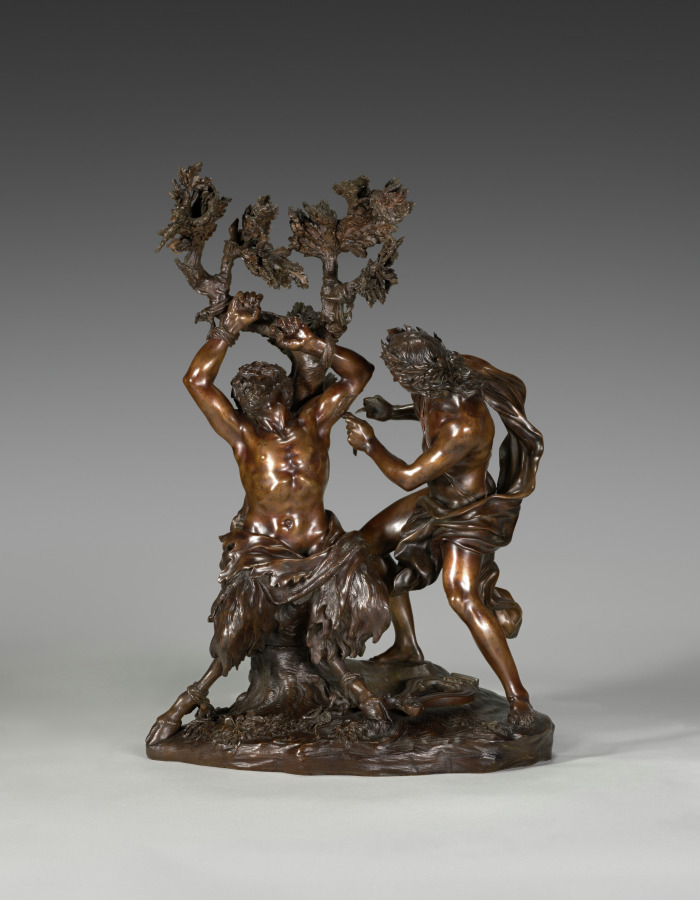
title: Apollo Flaying Marsyas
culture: Italy, Florence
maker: Giovanni Battista Foggini (Italian, 1652–1725)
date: c. 1691–1700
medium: Bronze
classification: Sculpture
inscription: 1136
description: According to myth, the overconfident satyr (half-goat, half-man) Marsyas challenged Apollo, god of the arts, to a musical duel. The defeated Marsyas was tied to a tree and skinned alive in punishment for his pride. Foggini’s bronze captures the moment after Apollo’s victory as the bound Marsyas cries out in agony while the god makes the first incision. The satyr’s anguish is echoed by the gnarled branches; Apollo’s wrath is manifested in his billowing drapery.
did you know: The lyre with which Apollo outperformed Marsyas can be seen between his feet, cast down upon his victory.